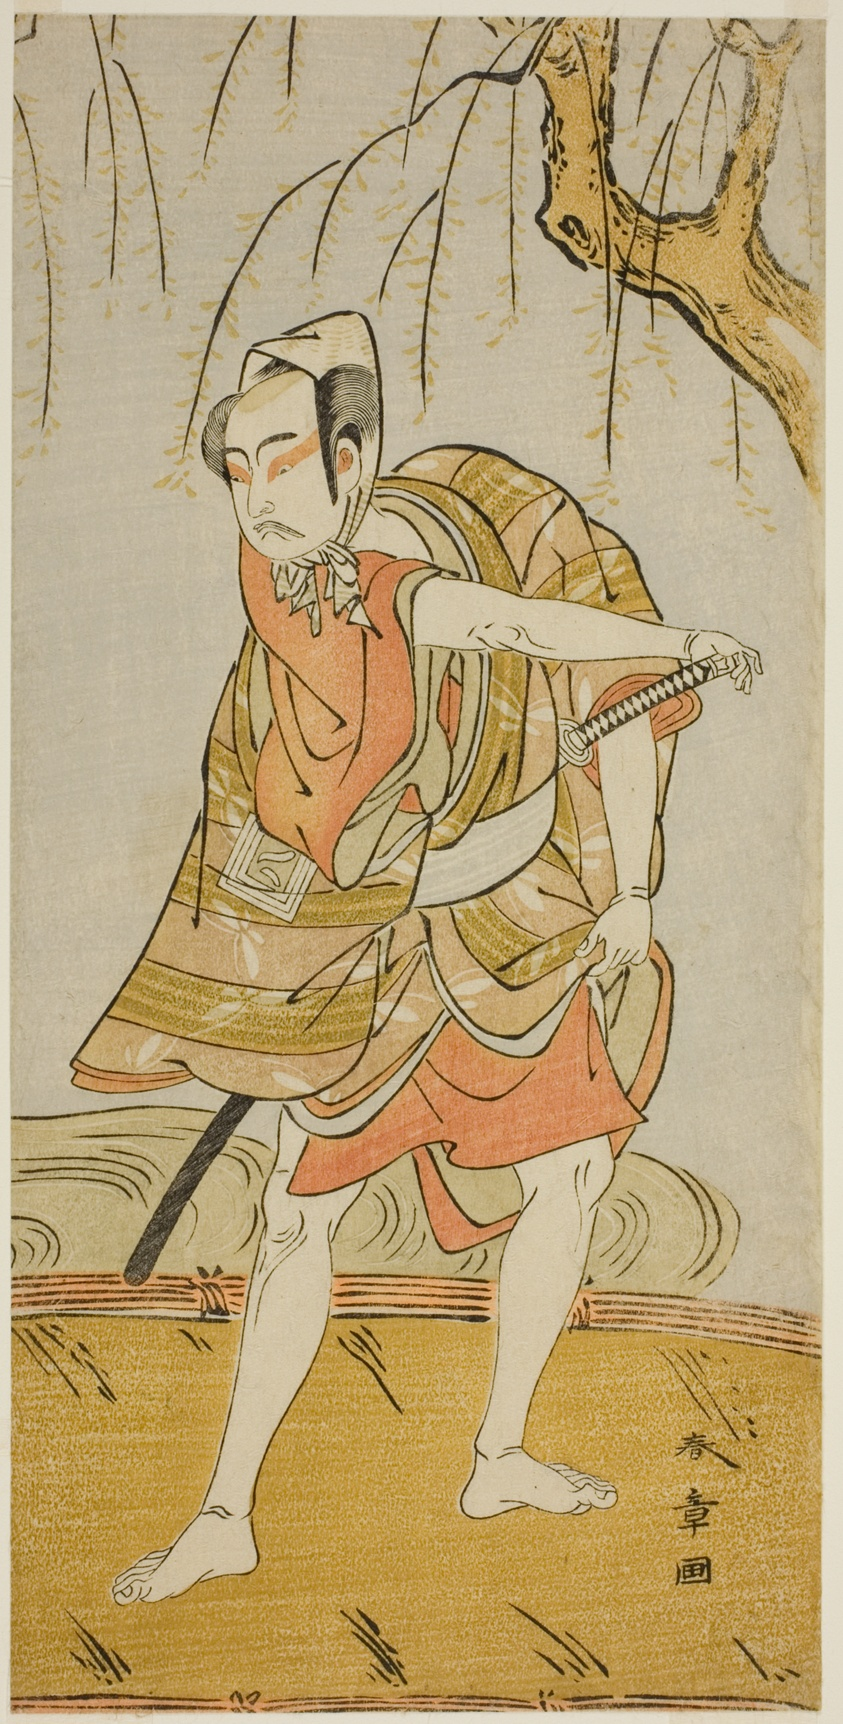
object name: Print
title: The Actor Ichikawa Yaozo II as Hiranoya Tokubei (?) in the Play Wada Sakamori Eiga Kagami (?), Performed at the Nakamura Theater (?) in the Third Month, 1773 (?)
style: Japanese (culture or style)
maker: Katsukawa Shunsho 勝川 春章; Japanese, 1726-1792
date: c. 1773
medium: Color woodblock print; hosoban; right sheet of diptych (?)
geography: Japan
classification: woodblock print; print; asian art